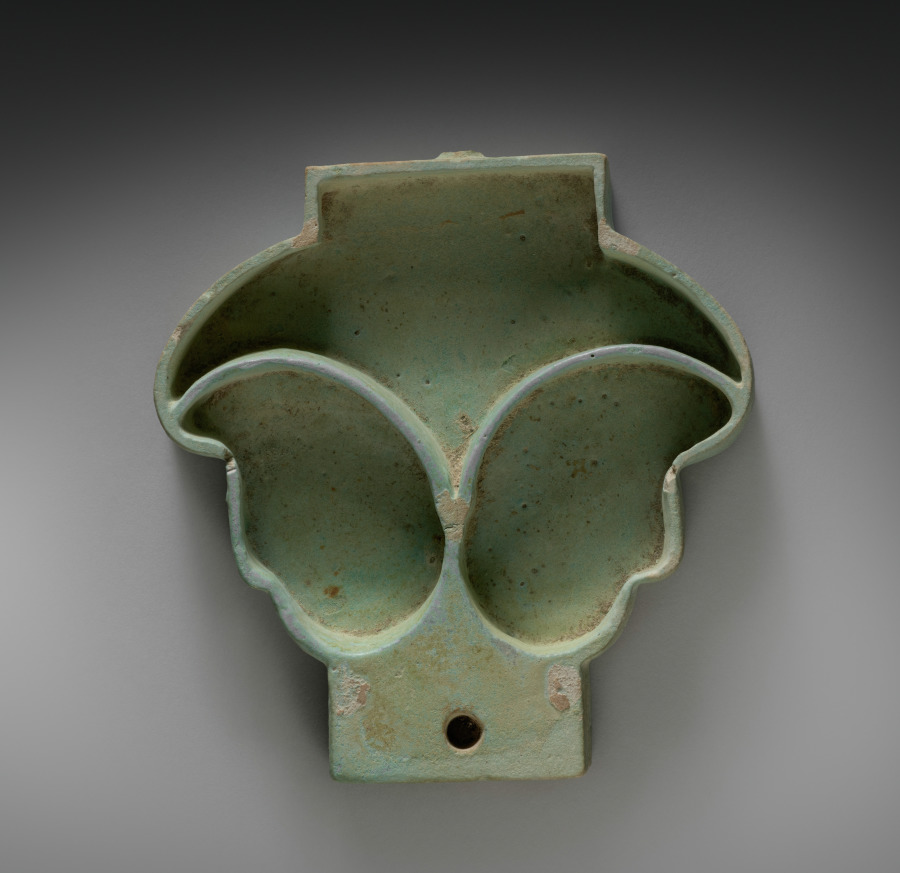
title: Box (Pyxis) in the Form of a Composite Capital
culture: Egypt, Greco-Roman period (332 BCE–395 CE), Ptolemaic dynasty (305–30 BCE)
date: 305–30 BCE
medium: pale robin's-egg blue faience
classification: Vessels